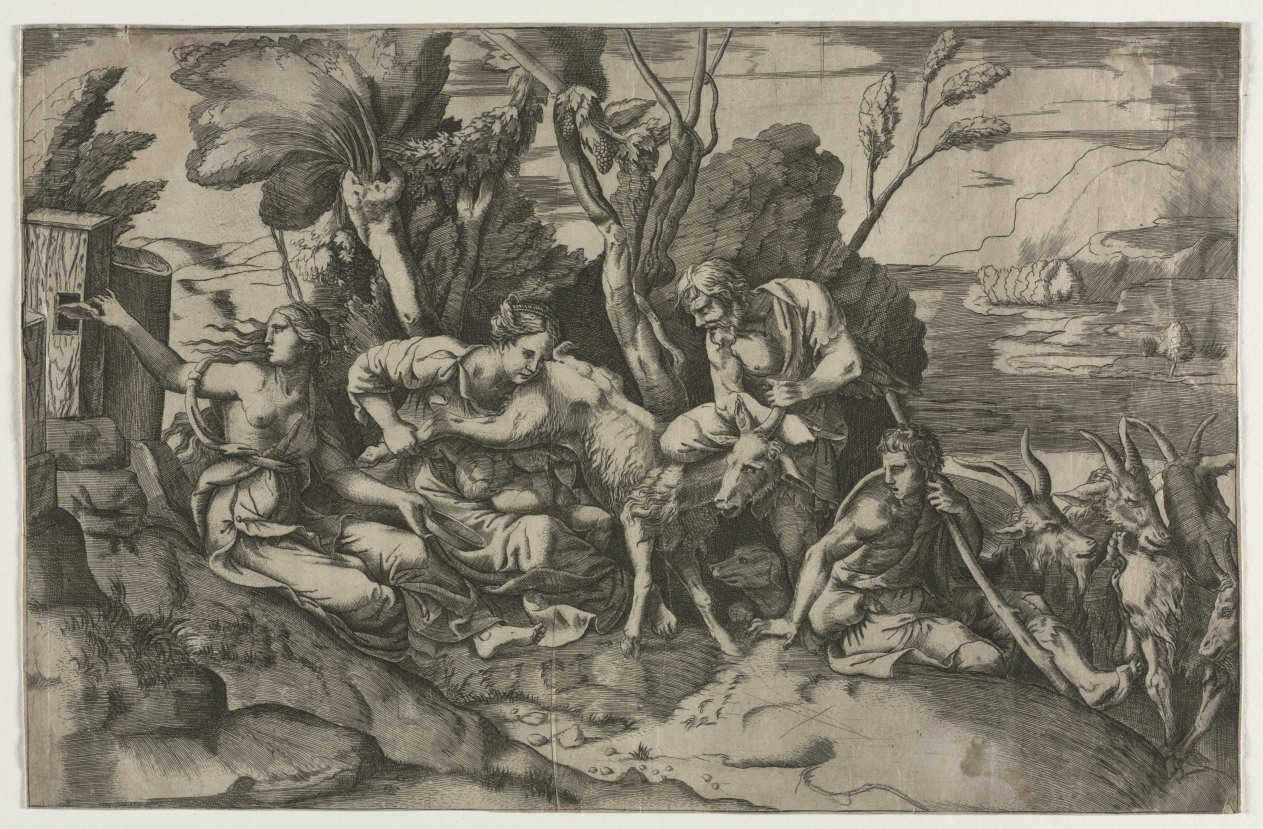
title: Jupiter Suckled by the Goat Amalthea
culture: Italy, 16th century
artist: Giulio Bonasone (Italian, c. 1510–after 1576)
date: c. 1530–70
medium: engraving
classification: Print